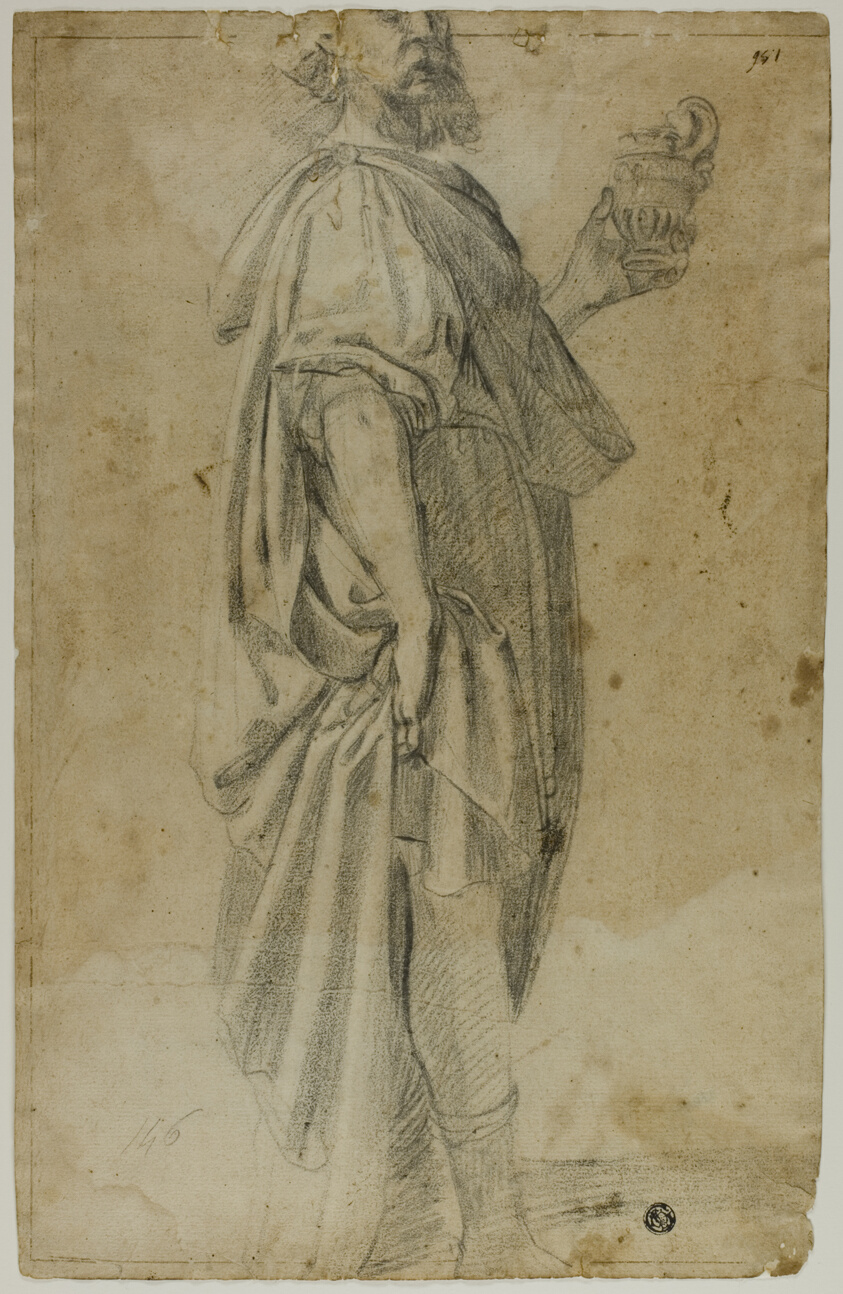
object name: Drawing and Watercolor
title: Standing Magus (recto); Sketch of Stable and Trees (verso)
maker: Peditrobably Domenico Fiasella (Italian, 1580-1669); or possibly Lodovico Carracci (Italian, 1555-1619); or possibly the circle of Matteo Rosselli (Italian, 1578-1650)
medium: Black chalk (recto), and red and black chalk (verso), on cream laid paper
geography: Italy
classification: drawings (visual works); prints and drawing